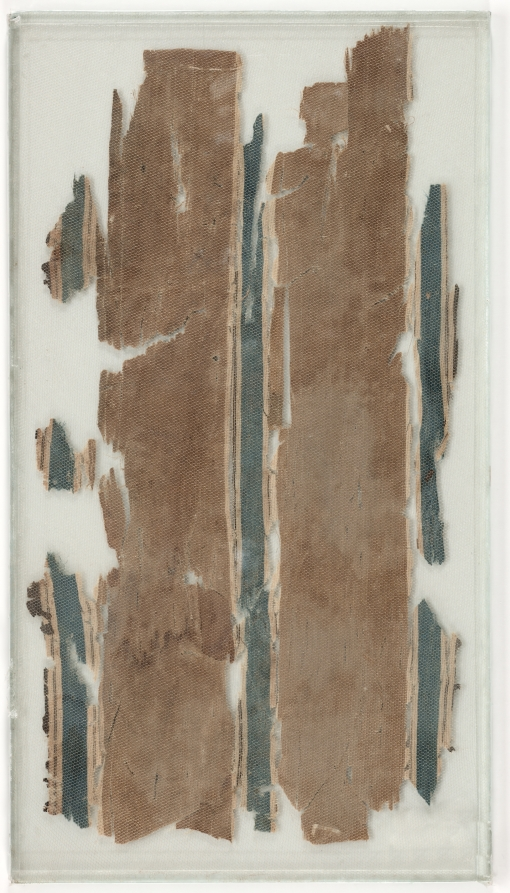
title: Silk fragment with striped pattern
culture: Syria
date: 900s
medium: plain weave variation with supplementary weft: silk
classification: Textile